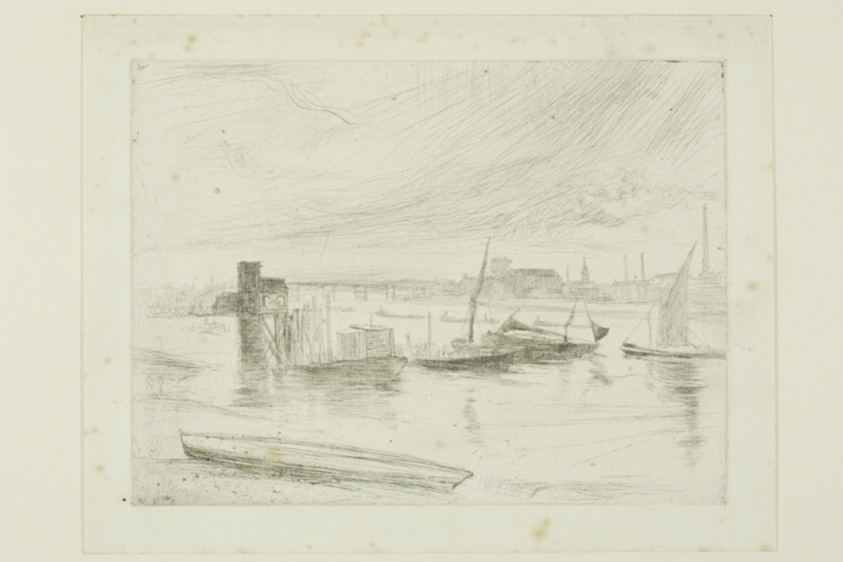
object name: Print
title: Battersea Dawn (Cadogan Pier)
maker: James McNeill Whistler (American, 1834-1903)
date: 1863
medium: Etching and drypoint with foul biting in black ink on cream laid paper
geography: United States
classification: etching; print; prints and drawing; foul biting; drypoint; paper